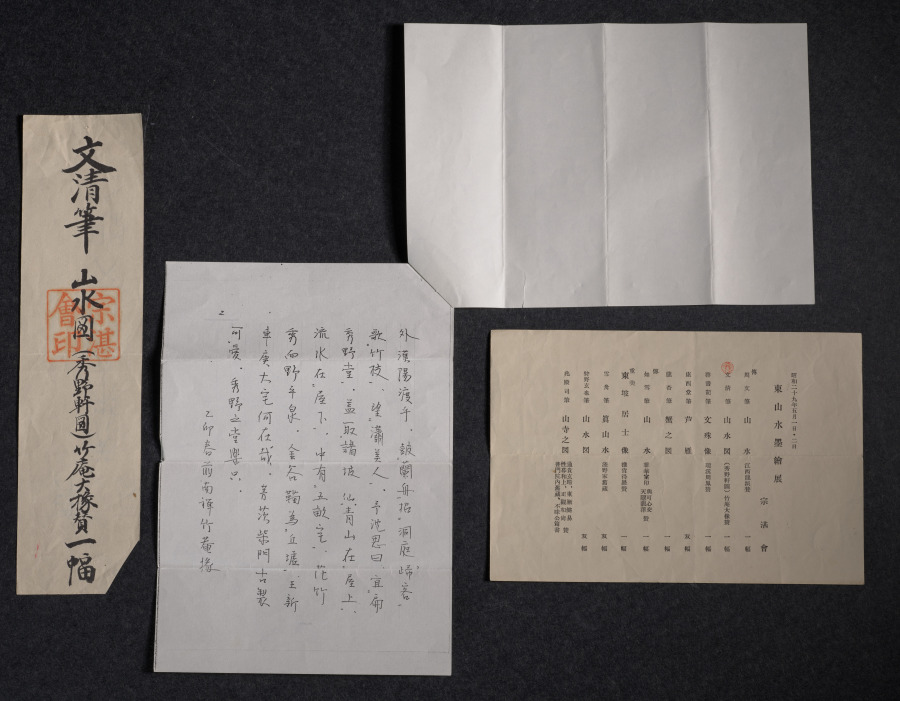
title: Shuyadō (Studio of Lofty Rusticity)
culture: Japan, Edo period (1615–1868)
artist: after Bunsei (Muncheong) (Japanese or Korean, active mid-15th century)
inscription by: after Chikuan Daien (Japanese, 1362–1439)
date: 1700s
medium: hanging scroll, ink on paper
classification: Painting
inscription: inscription by Chukuan Daien (Japanese, 1362-1439)m dated 1435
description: Hanging scrolls with assorted poems above and ink paintings below produced within Japan's Zen monastic community during the 1400s and 1500s are called poem-painting scrolls (shigajiku). This small painting was created much later in emulation of such works. While the original works often have a preface followed by poems by different monks, this composition has only a preface.